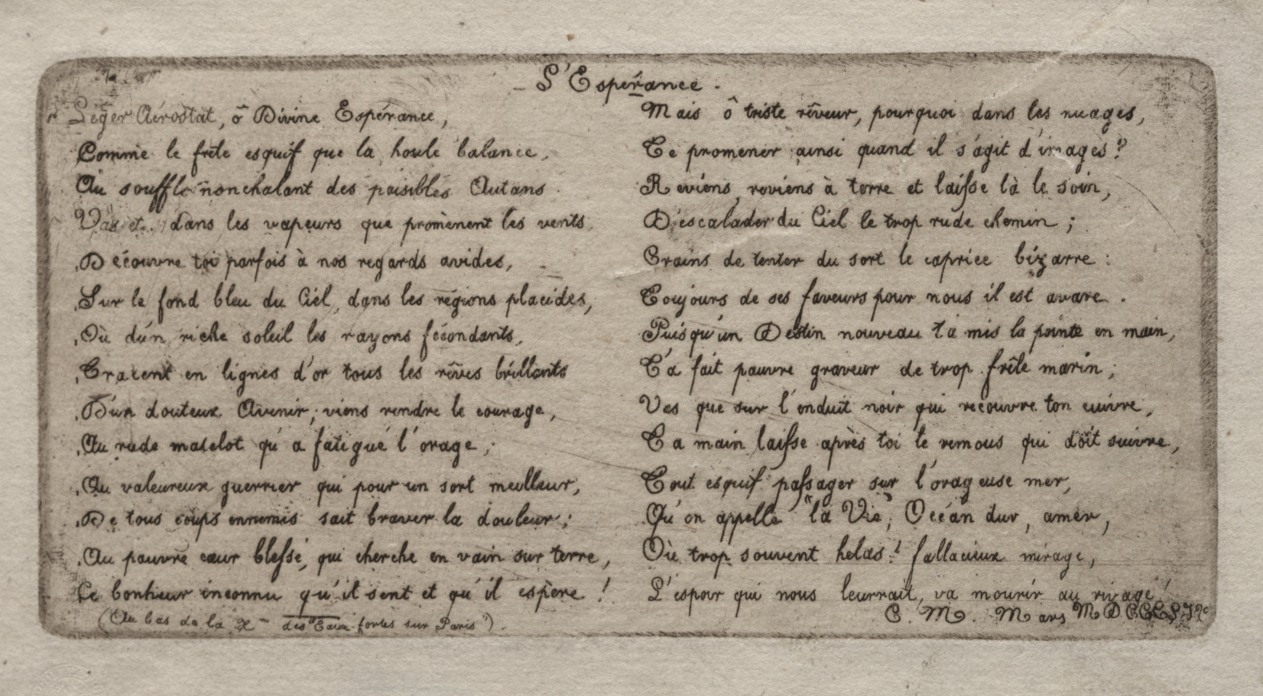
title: Etchings of Paris: Hope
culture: France, 19th century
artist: Charles Meryon (French, 1821–1868)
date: 1854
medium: etching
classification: Print